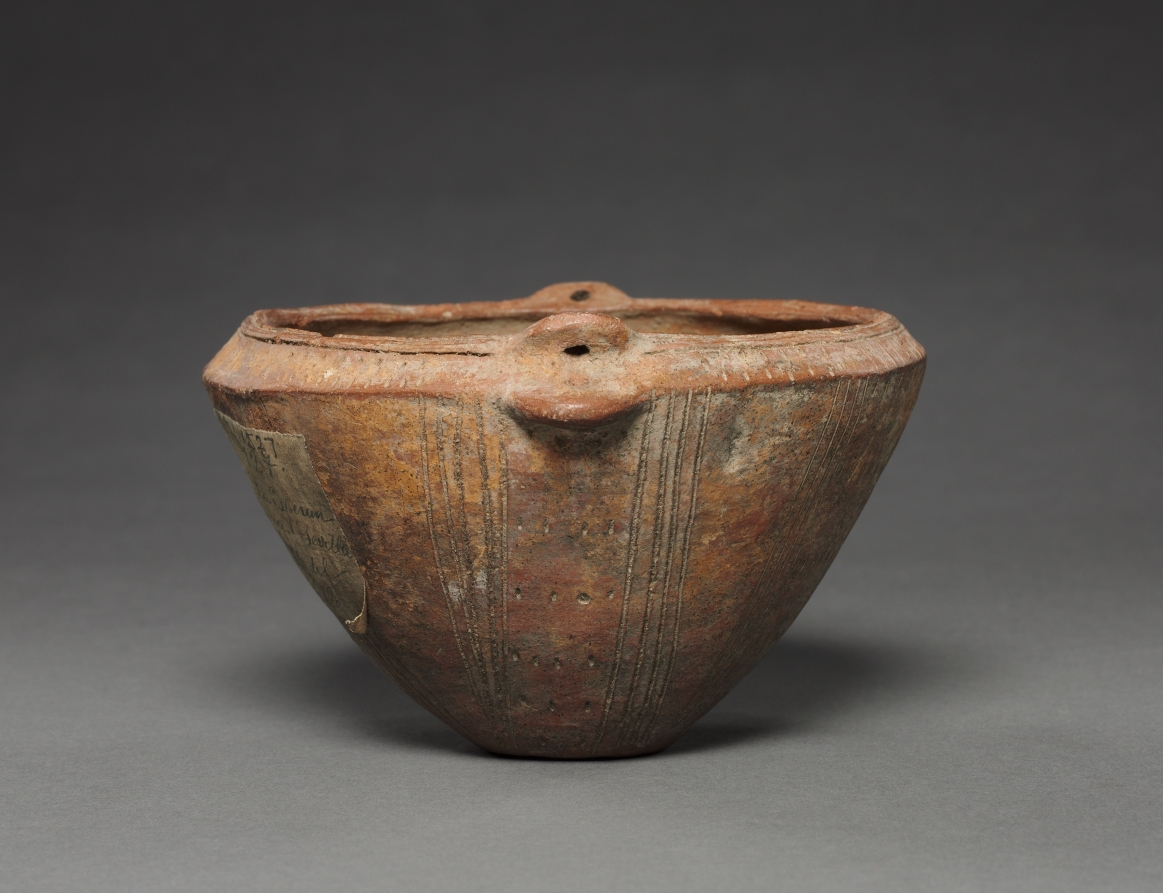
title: Dish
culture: Colombia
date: before 1550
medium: red ware with incised patterns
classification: Ceramic